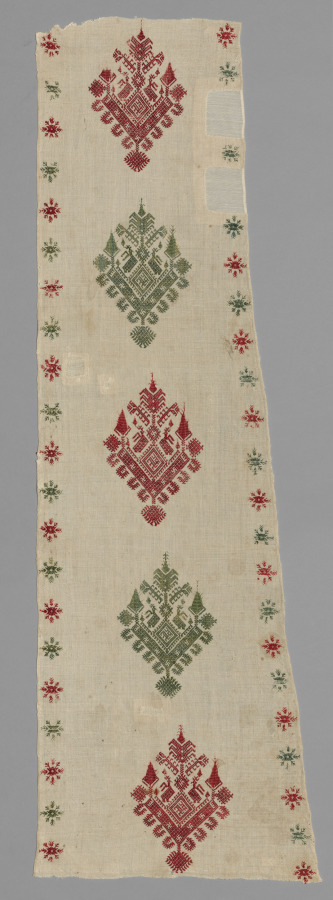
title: Portion of a Bed Tent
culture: Greece, Cyclades Islands, Pholegandros, 17th-18th century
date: 1600s - 1700s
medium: embroidery: silk on linen tabby ground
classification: Embroidery